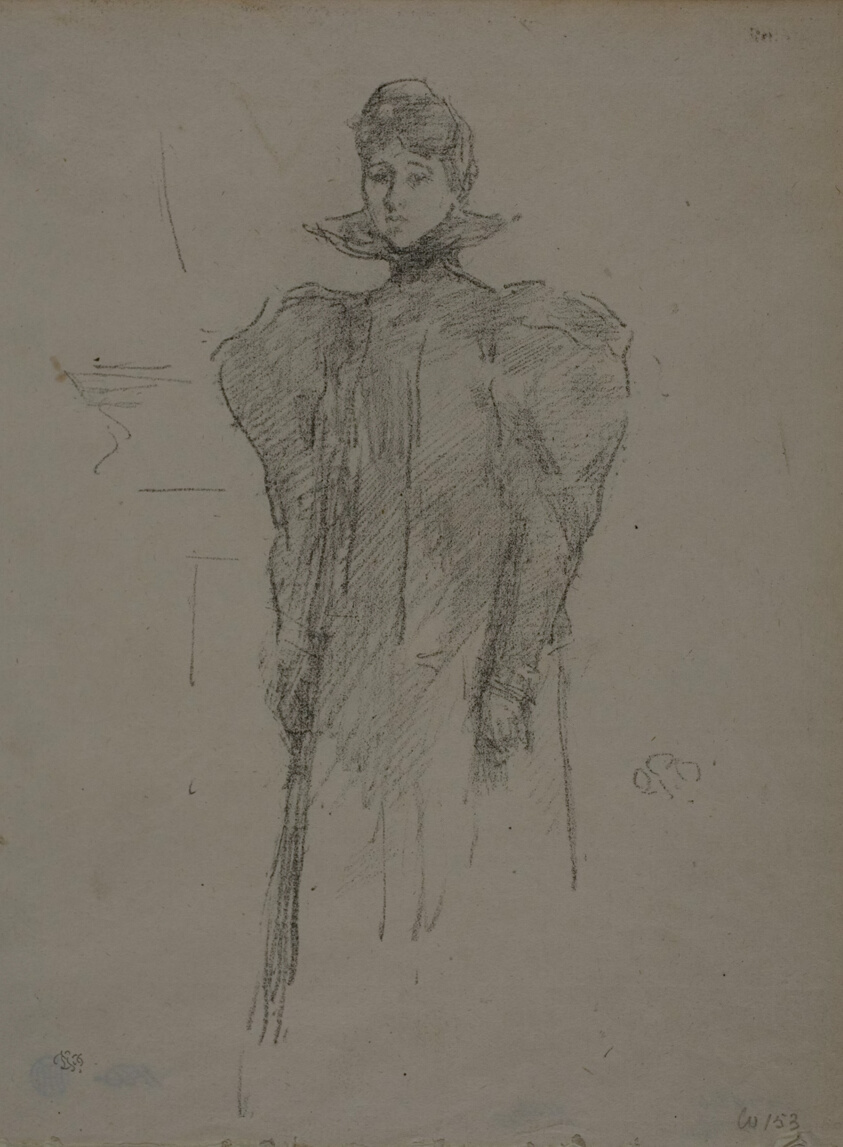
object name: Print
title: The Medici Collar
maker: James McNeill Whistler (American, 1834-1903)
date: 1897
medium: Transfer lithograph in black on ivory laid paper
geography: United States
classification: transfer lithograph; lithograph; print; prints and drawing; paper